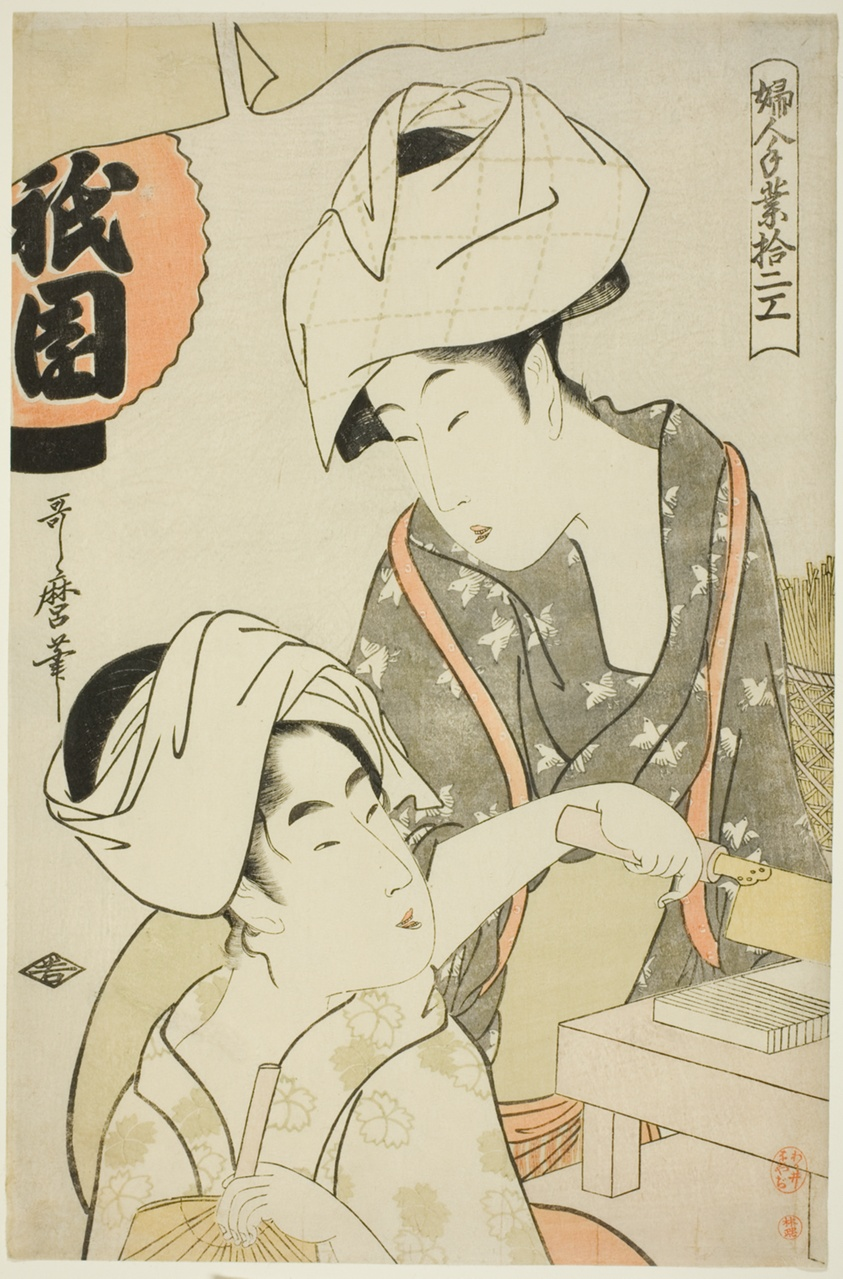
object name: Print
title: Women Preparing Gion Bean Curd, from the series "Twelve Types of Women’s Handicraft (Fujin tewaza juni-ko)"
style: Japanese (culture or style)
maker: Kitagawa Utamaro 喜多川 歌麿; Japanese, 1753 (?)-1806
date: c. 1798/99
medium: Color woodblock print; oban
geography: Japan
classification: woodblock print; print; asian art